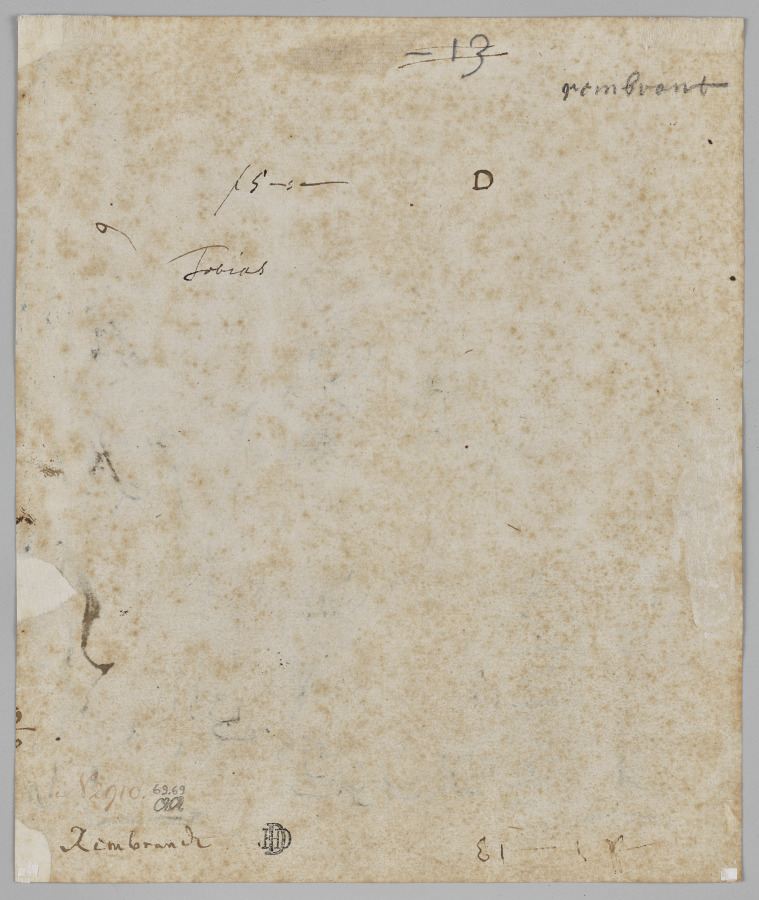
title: Tobias Healing His Father's Blindness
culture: Netherlands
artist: Rembrandt van Rijn (Dutch, 1606–1669)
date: c. 1640–45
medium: Pen and brown ink, touched with white gouache; framing lines in pen and brown ink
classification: Drawing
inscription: verso, upper center, in graphite: -13 [crossed out]; upper right, in black chalk: rembrant; upper right, in brown ink: D; upper center, in brown ink: [15-50?] / Tobias; upper left, in brown ink: 9 [sideways]; lower left, in brown ink: [illegible, cropped]; lower left, in brown ink: No 2910; lower left, in brown ink: Rembrandt; lower right, in brown ink: -d[l?]-13 [upside down]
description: This drawing is a prime example of the Dutch painter Rembrandt van Rijn's innovative approach to biblical narrative, in which he often humanized traditional pictorial formulas through the inclusion of observed details from everyday life. It depicts the climactic moment of the Book of Tobit, an apocryphal book of the Old Testament, in which, instructed by the archangel Raphael, Tobias heals his father Tobit's blindness by rubbing his eyes with fish gall. With spontaneity, a deft hand, and deceptive simplicity in his mark-making, Rembrandt depicts an intimate family scene including the archangel, Tobias, Hannah, and Sarah around a seated Tobit. Hannah’s spectacles, a unique detail among images of the scene created by Rembrandt and his circle, further thematizes sight. Rembrandt’s most innovative addition to the story centers on Tobias, who concentrates intensely to use a scalpel, rather than fish gall, to perform a cataract operation on his father’s left eye. Cataract surgery was a new procedure pioneered in Amsterdam in 1635 by Dr. Job Janszoon van Meekren, and Rembrandt may have witnessed the doctor perform it.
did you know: The seated figure in this drawing is receiving cataract surgery on his left eye, a procedure pioneered in Amsterdam in 1635 by Dr. Job Janszoon van Meekren.